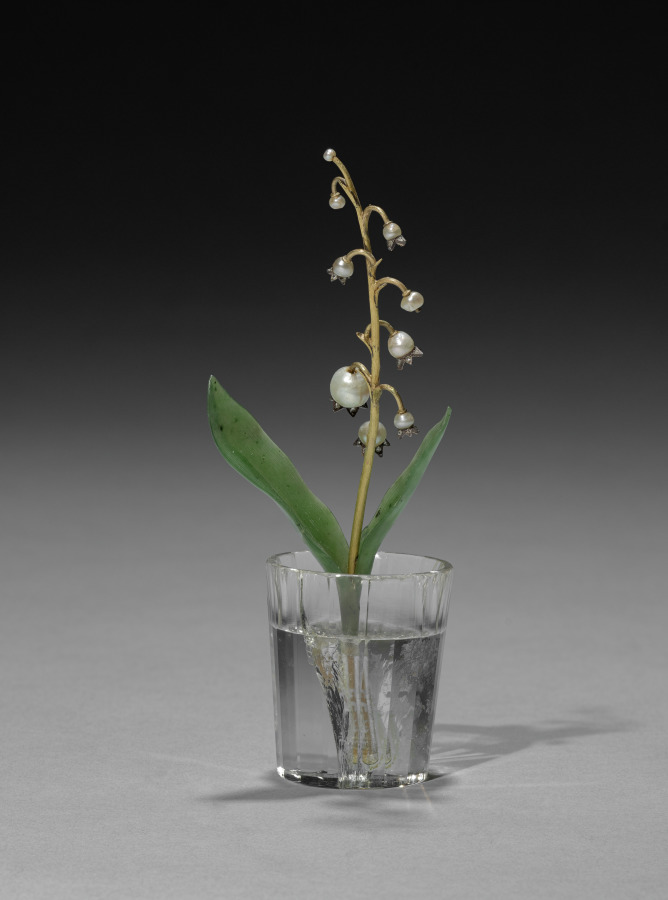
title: Flower Study of a Lily of the Valley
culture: Russia, St. Petersburg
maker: House of Fabergé (Russian, 1842–1918)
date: c. 1885–1915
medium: pearls, diamonds, jade, rock crystal, silver, gold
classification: Miscellaneous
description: This flower study resembles a stem of lily-of-the-valley. Fabergé’s inspiration for his flower studies is said to have come from the floral brooches of precious stones that were made in the 1700s for Catherine the Great as well as from the Japanese art of flower arranging, known as ikebana. Small and delicate, Fabergé’s flower studies were given as intimate gifts to friends by the tsarina and others in the court. She also liked to take them around to wherever the imperial family was residing as a reminder of spring during the harsh Russian winters.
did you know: The stems of Fabergé’s flower studies are set into little basins carved from rock crystal to resemble pots of water.